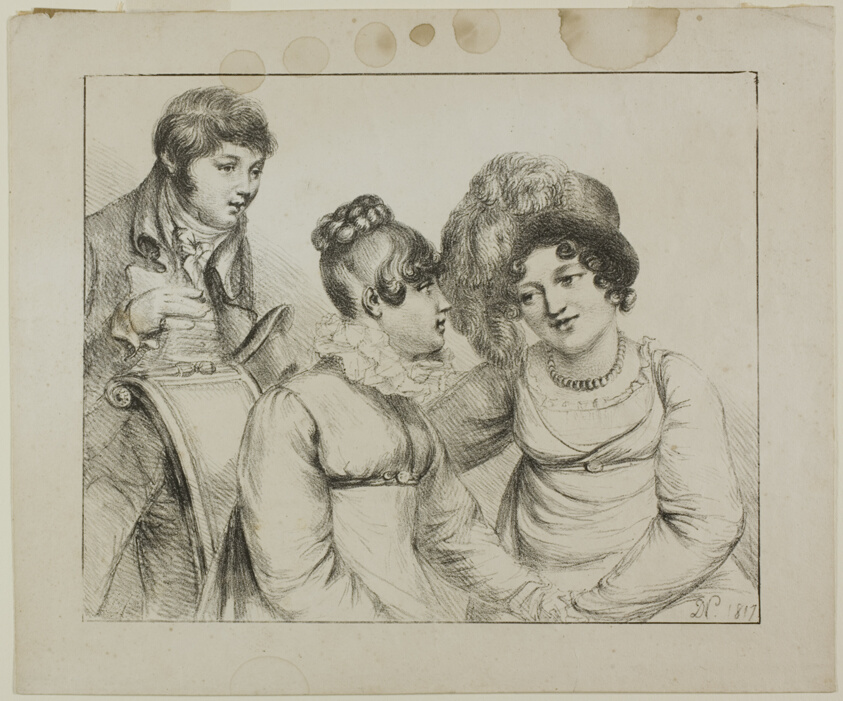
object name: Print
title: Man and Two Women Conversing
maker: Dominique-Vivant Denon (French, 1747-1825)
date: 1817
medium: Lithograph in black on cream wove paper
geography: France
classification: lithograph; print; prints and drawing